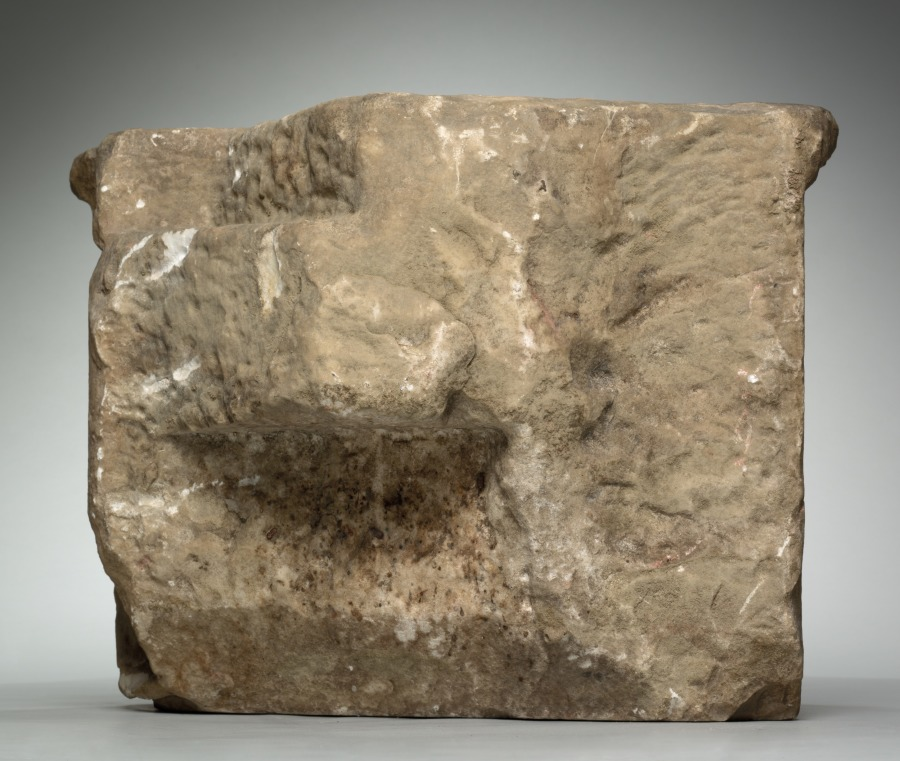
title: Engaged Capital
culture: Southern France, Abbey of Larreule, near Tarbes, 15th century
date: 1400s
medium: limestone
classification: Sculpture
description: This capital belongs to a surviving group including other architectural fragments that once decorated the cloister of the Abbey of Larreule. A cloister was a covered walkway or arcade, usually around all four sides of a square area of grass (the "cloister garth"). The seclusion of the cloister was the monks’ exclusive domain, off limits to others. Here, the monks were supposed to pray, study, meditate, and exercise in privacy and solitude. Such cloister capitals served both to instruct the monks and as a focus for their devotions. Other capitals in this series are installed in the Jardin Massey at Tarbes, near the original abbey. An arch from Larreule has been assembled with other associated French capitals at The Cloisters in New York.